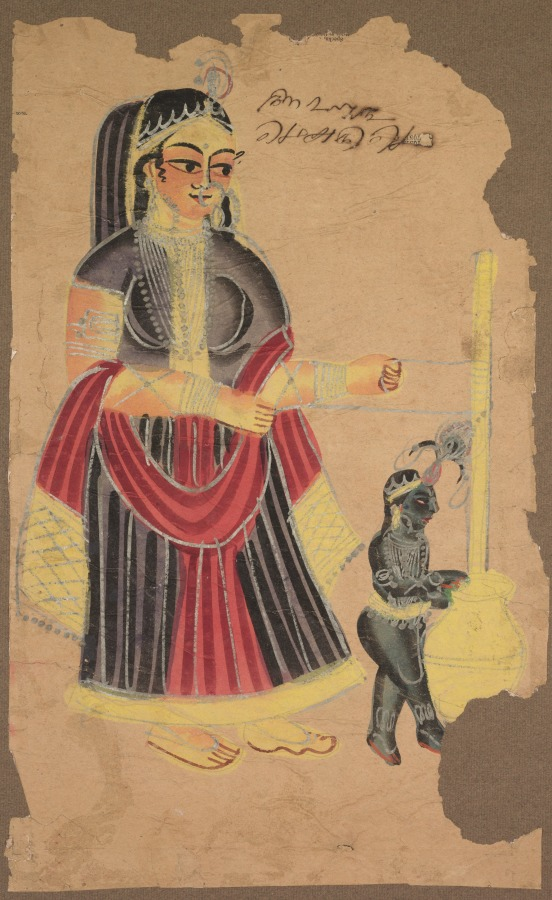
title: Yasoda and Krishna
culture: Eastern India, Bengal, Kolkata, Kalighat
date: c. 1890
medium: Gum tempera, graphite, ink, and tin on paper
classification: Painting